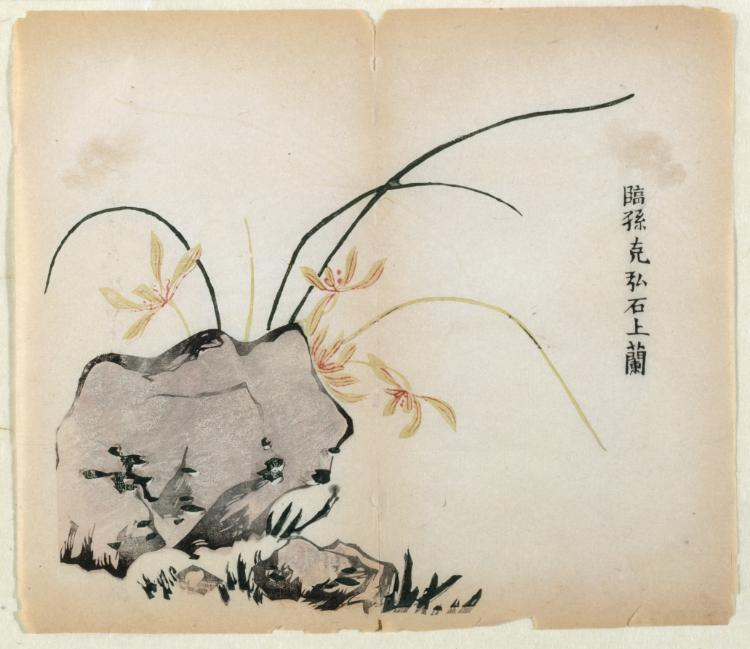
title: Orchid on Rocks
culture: China, Qing dynasty (1644-1911)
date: 1700s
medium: color woodblock print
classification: Print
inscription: 臨孫克弘石上蘭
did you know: This print is from the Mustard Seed Garden Painter's Manual.